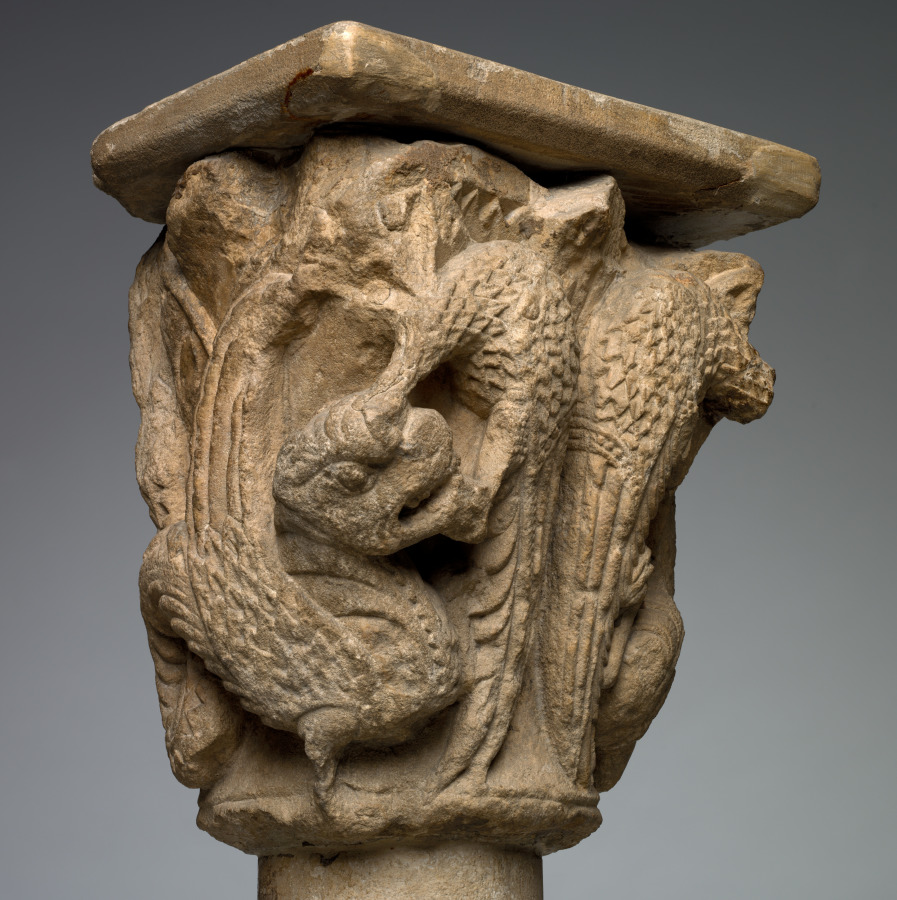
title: Engaged Capital with Birds and Dragons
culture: Western France, Bordelais or Dordogne, late 12th Century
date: late 1100s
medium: limestone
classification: Sculpture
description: Monstrous images were prevalent in the decoration of religious buildings during the Middle Ages. Such images must have impressed, perhaps even terrified, the monks and visitors who spent much of their time within the cloister or church, a place of prayer, contemplation, and reflection. Scholars have speculated how such images would have been received by the people given the ubiquity of monsters in medieval society. The carved monsters, often symbolizing vice and retribution for sin, were possibly designed to provoke a range of emotional responses including laughter, wonder, surprise, fear, and shock. This striking imagery must have had a strong impact, which in turn led Saint Bernard of Clairvaux (1090–1153), the spiritual head of the Cistercian order, to admonish their use as distracting from prayer.